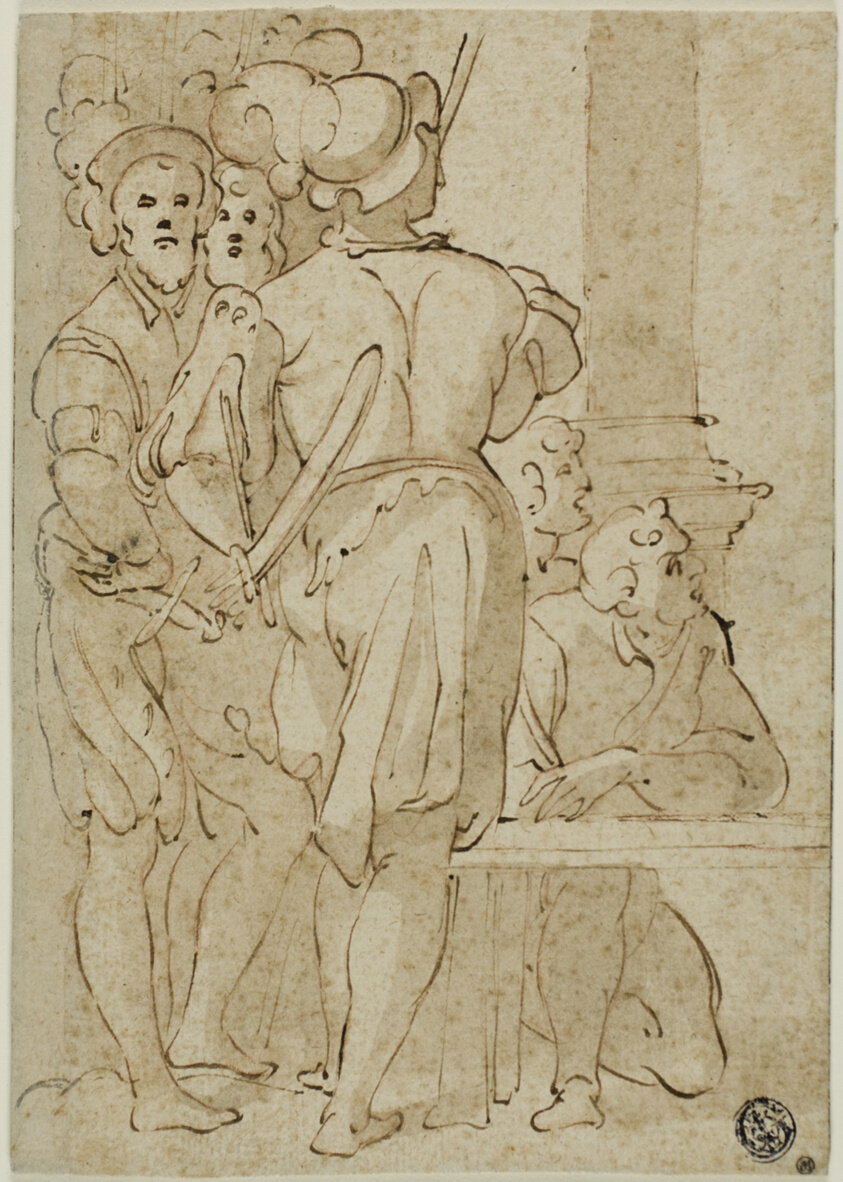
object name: Drawing and Watercolor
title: Standing Soldiers and Kneeling Figures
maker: After Taddeo Zuccaro; Italian, 1529-1566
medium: Pen and brown ink, with brush and brown wash, and red chalk, on ivory laid paper, laid down on ivory card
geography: Italy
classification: ink with wash; drawings (visual works); prints and drawing